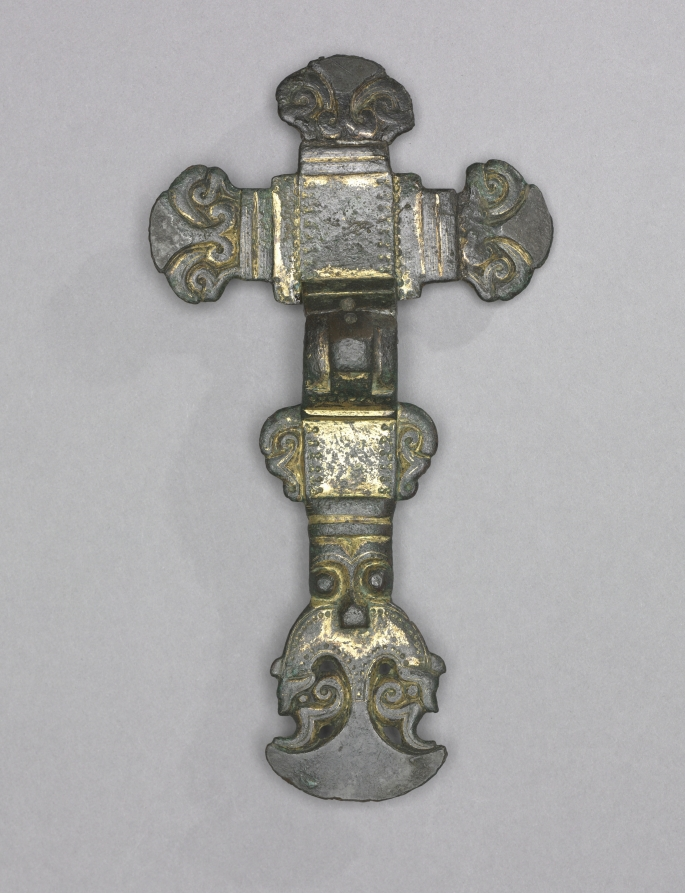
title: Fibula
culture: Anglo-Saxon, Migration period, 6th century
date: 500s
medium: gilt bronze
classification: Jewelry